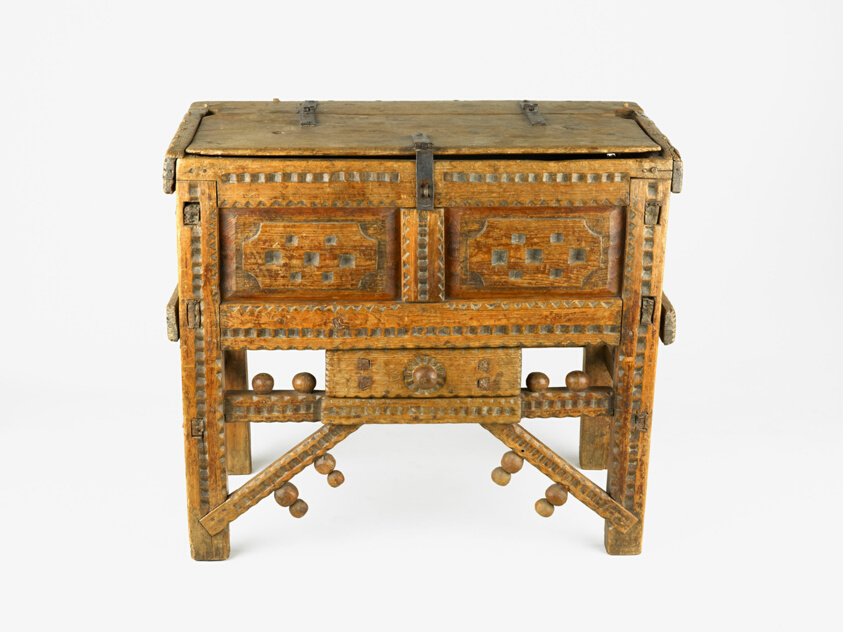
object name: Furniture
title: Chest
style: Folk Art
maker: Attributed to the Valdés family (active 18th–19th centuries); New Mexico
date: 1780–1830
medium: Ponderosa pine, metal, and paint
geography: New Mexico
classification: case furniture; furniture; american decorative arts; american arts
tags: furniture, chest